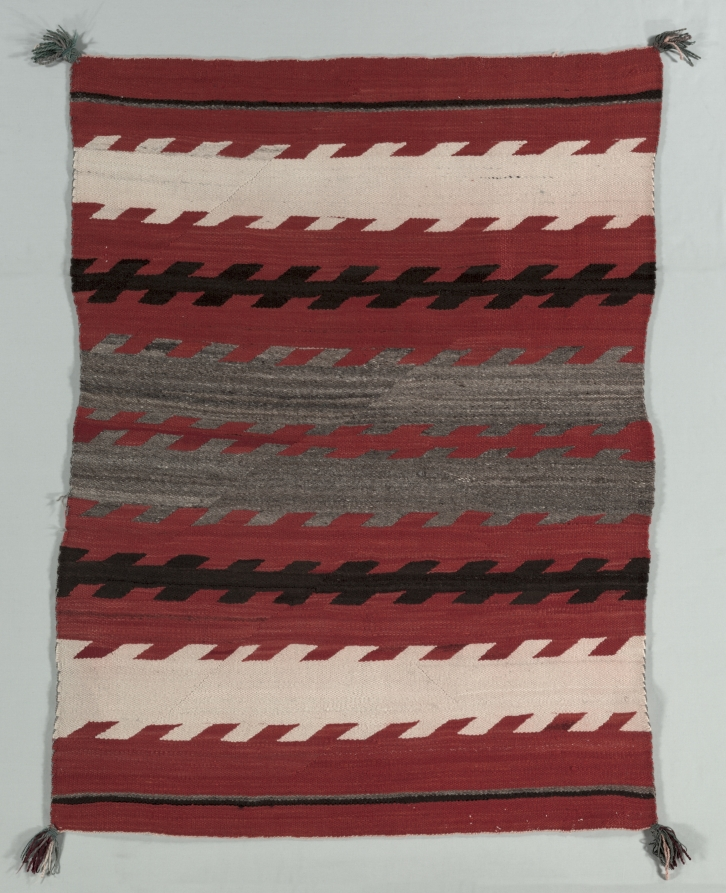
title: Banded Rug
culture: America, Native North American, Southwest, Navajo, Post-Contact, Transitional Period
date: c. 1890–1900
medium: tapestry weave: cotton and wool: (handspun and Germantown)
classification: Textile